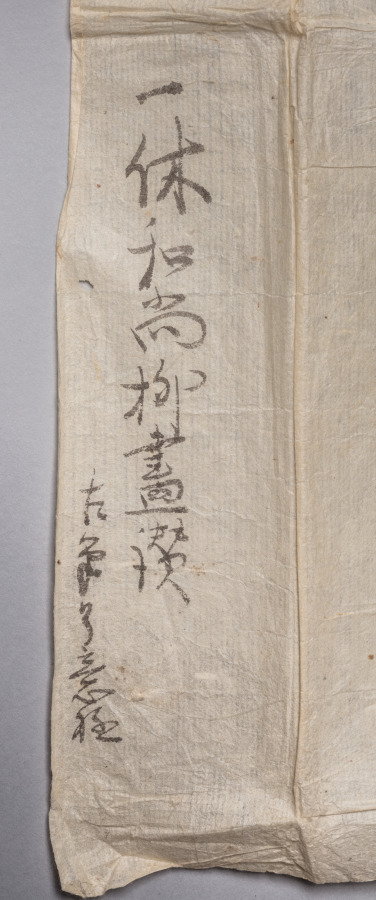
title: Calligraphy with Willow and Swallows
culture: Japan, Muromachi period (1392–1573)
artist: Ikkyū Sōjun (Japanese, 1394–1481)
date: 1400s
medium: hanging scroll, ink on paper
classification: Painting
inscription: How many days has it rid itself of the crow’s cloth? It knows not!/ Lovely is its body so nimble and neat./ Neither men of wealth, courtly position, or power can come close to the unfettered, noble swallow!/ With the coming of spring, it seems to be flying about, dancing around the grass hut of the foolish Priest. signed: Unkasō Isshi Tōkai jun Ikkyū shi ga ippitsu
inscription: outer box inscribed: Ikkyū Ōshō Enshi-zu Jigasan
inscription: inner box side lid inscribed: Showa 50 (1975), November by Tayama Honan with kao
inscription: Inner box side lid inscribed: Ikkyū Ōshō Bokuseki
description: The famed Buddhist monk Ikkyū is best remembered for his calligraphy. Calligraphic conventions of his time called for brushwork that did not vary much in style from character to character. However, as Ikkyū’s lines progress, his brushwork wanders between standard script and a sort of shorthand, marked by an uneven distribution of ink and a reduction of the characters to only the most necessary strokes. Ikkyū’s direct communication of emotion via brushwork became characteristic of the works produced by monks affiliated with the temple Daitokuji later in the Edo period (1615–1868).